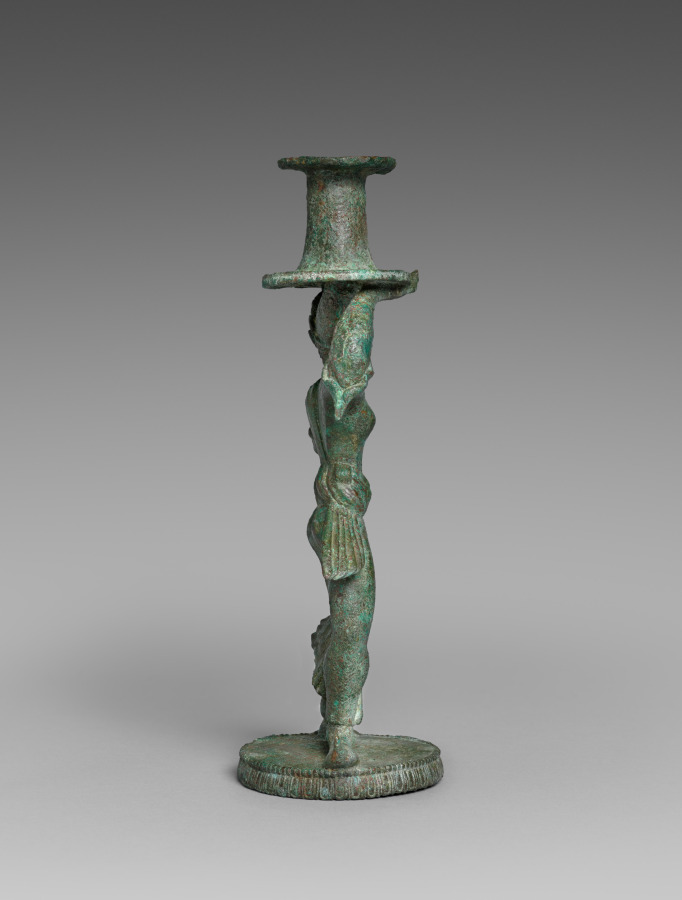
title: Candelabrum Stand of a Dancing Maenad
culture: Etruscan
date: 525–500 BCE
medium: bronze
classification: Sculpture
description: Conceived primarily in two dimensions—front and rear silhouette—this small bronze dancer probably once belonged to an elaborate candelabra or incense burner. The exaggeratedly long fingers and pointed shoes characterize the work as Etruscan, as do the stylized folds of the figure’s dress, which add visual interest but not verisimilitude. While her right hand holds above her head a cylindrical support, her left squeezes a small object, perhaps a fruit or clapper.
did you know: A small turtle beneath the figure’s back foot suggests a rustic setting.